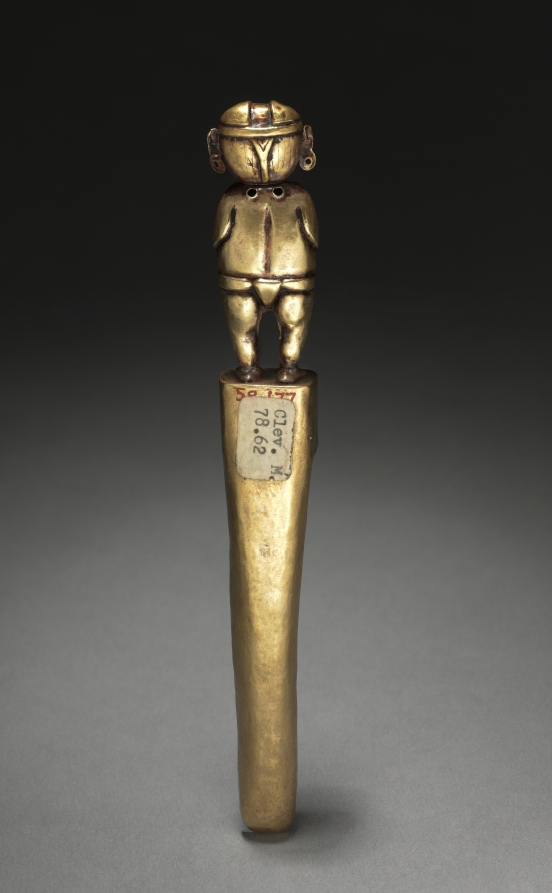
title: Spoon with Human Figure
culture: Peru, North Highlands, Chavín de Huantar(?), Chavín style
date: c. 500–200 BCE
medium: hammered and cut gold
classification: Metalwork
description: There seems to be a link between Chavín religion and appearance of the Andes’ first large precious-metal objects, made using revolutionary new metallurgical processes. Chavín may have developed these technical innovations to express the inexpressible, the "wholly other" nature of its religion. In many areas, elite men and women wore the ornaments as emblems of their ties to this religion, and eventually were buried with them. These 16 objects, along with three others not in the museum’s collection, are said to have come as a group from Chavín itself.